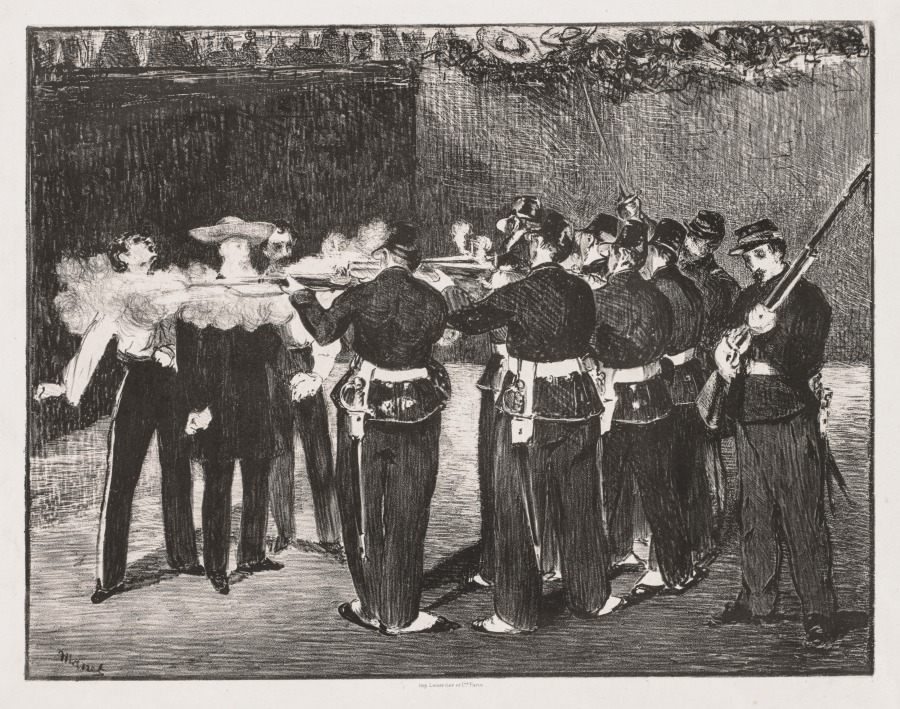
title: The Execution of Emperor Maximilian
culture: France, 19th century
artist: Édouard Manet (French, 1832–1883)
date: 1867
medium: lithograph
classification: Print